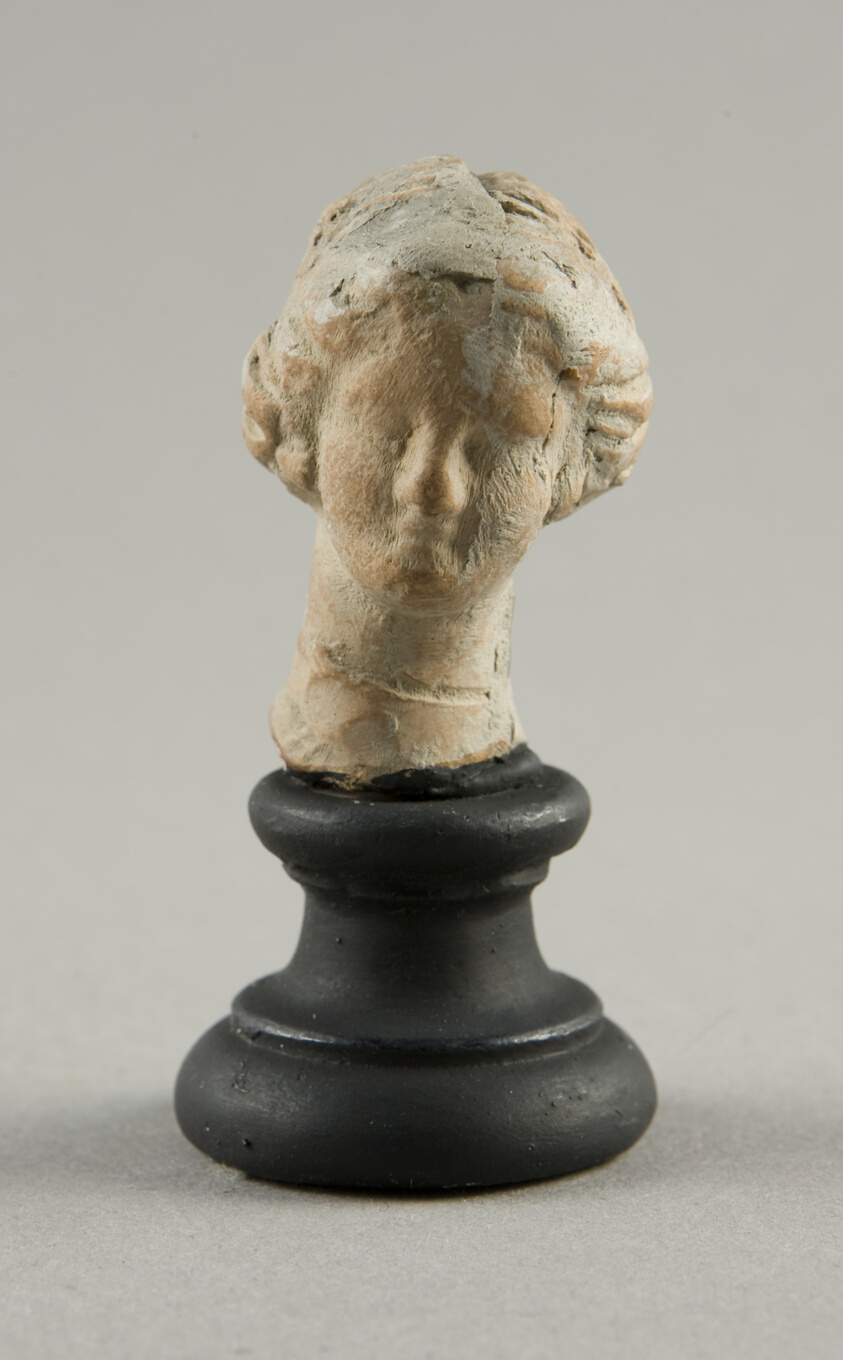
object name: Sculpture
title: Head of a Woman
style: greek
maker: Greek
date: 4th-3rd century BCE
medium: terracotta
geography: Greece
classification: earthenware; ceramics; sculpture; ancient art